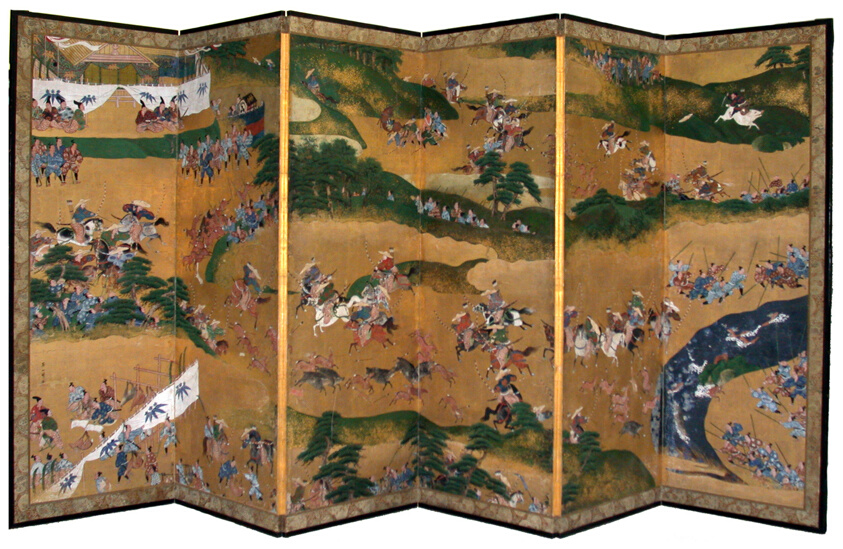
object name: Furniture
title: Hunting Scene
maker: Hanabusa Ippo (Japanese, 1691–1760)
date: 18th century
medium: Pair of six-panel screens; ink, colors, and gold on paper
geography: Japan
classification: screen; paper; asian art; furniture